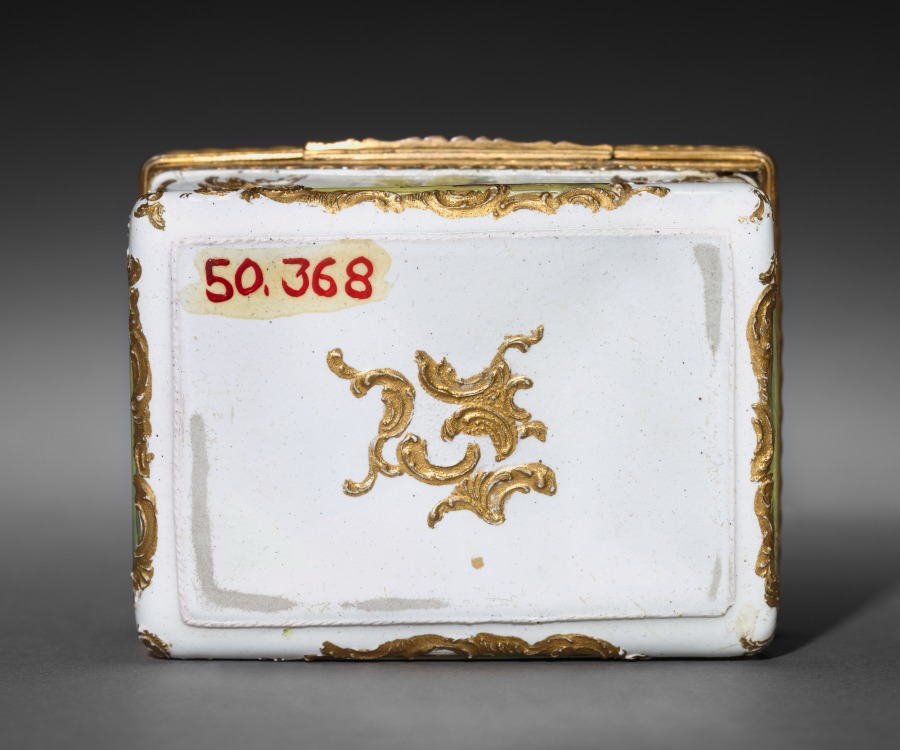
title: Box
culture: England, 18th century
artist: South Staffordshire Factory (British)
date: 1760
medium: enamel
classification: Enamel